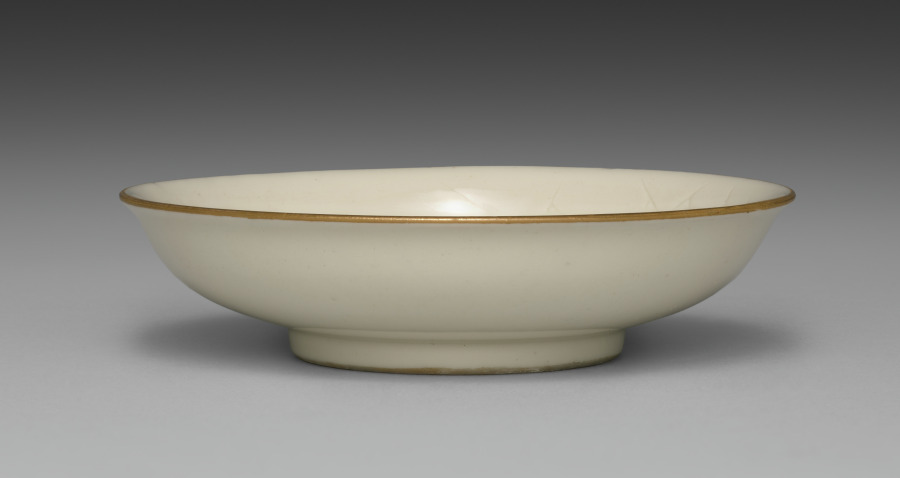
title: Small Dish from Dining Set with Plum Blossoms and Cracked-Ice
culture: Japan, Meiji period (1868–1912)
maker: Seifū Yohei II (Japanese, 1844–1878)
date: c. 1875–78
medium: Porcelain with molded designs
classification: Ceramic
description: Each item in this set has a delicate low-relief design of flowering plum branches over scattered, intersecting lines meant to resemble the cracked-ice surface of a frozen body of water and is signed on the base in gold pigment. While Yohei II produced many fine works in underglaze blue, like those produced by Kiyomizu Shichibei, he also made works in quite different styles later in his career, from the early 1870 s. In 1873, he was appointed purveyor to the Industrial Center of Kyoto Prefecture, a designation associated with Kyoto’s efforts to reach an international market through the port of Kobe; and from 1875 until his death, he was involved in national-level projects to present Japanese ceramics across the world. It was during this period that Yohei III was apprenticed to Yohei II, and it has been suggested that this set may in fact be an early example of Yohei III’s work, which he signed with his teacher’s name. Decorated with flowers resembling Japanese textile motifs, the set calls to mind the design of Yohei II’s pair of vases with plum blossoms in the Victoria and Albert Museum. Here, the elaborate trees created for a formal public exhibition setting have been translated into the approachable blossoms of the genteel domestic environment. While the designs are consistent across the pieces, each raised flower petal and pistil and each incised line in the ice was done by hand, so the cups, bowls, and dishes are similar yet unique. The bottoms of two boxes once identified the set’s owner, but the information has been deliberately obscured with black ink. However, inscriptions still visible appear to indicate two occasions, once at the end of July 1886 , and once again in June 1916 , when parts of the set were requested from Hokura in Niigata Prefecture. The location corresponds to a neighborhood in the present-day city of Jōetsu. The surname Tsuji 辻 also appears on a paper tag affixed to one of the box cloths. Future research may possibly reveal more about their provenance. A vase by Yohei III in a private collection combines the formal grandeur of the Yohei II vases in the Victoria and Albert Museum with the gentler design of this dining set, placing flowering plum trees against soft, scalloped-edge clouds resembling those in golden screens.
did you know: The dining wares have a creamy white coloration that the four boxes containing them identify as Korean in style.